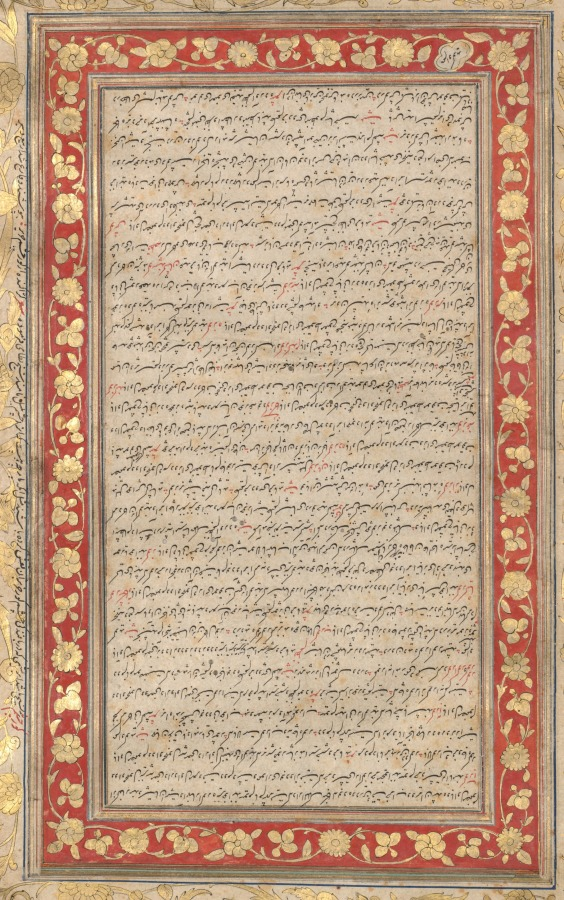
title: An Illuminated Folio from the Royal Manuscript of the Farhang-i Jahangiri (verso)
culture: Mughal India, court of Jahangir (1605–1627)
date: 1607–8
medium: Gum tempera, ink, and gold on paper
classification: Painting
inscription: Verso: “Gur” (name of a people in India) to “Gush” (morning east breeze, zephyr)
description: Farhang-i Jahāngīrī, one of the most complete and authoritative dictionaries of the Persian language, was compiled by Mir Jamal al-Din Husayn Inju. It took him 12 years to compile over 9,000 words with definitions and examples from verses by Persian poets. He was born in Shiraz, Iran, but lived most of his life in Agra, India, so the dictionary was named honor of the Mughal emperor Jahangir, who reigned from 1605 to 1627.